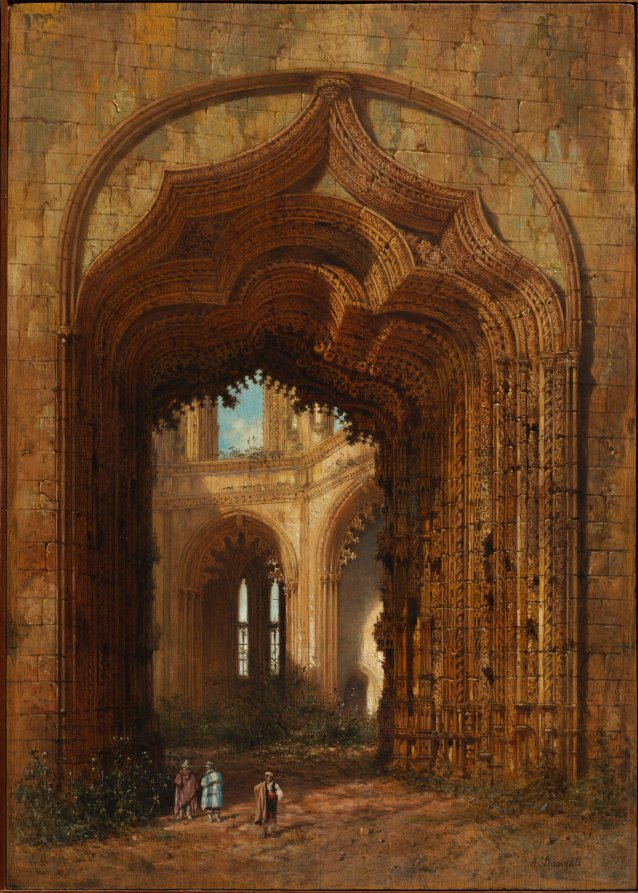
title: Ruined Church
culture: France, 19th century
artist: Adrien Dauzats (French, 1804–1868)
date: c. 1840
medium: oil on panel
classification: Painting